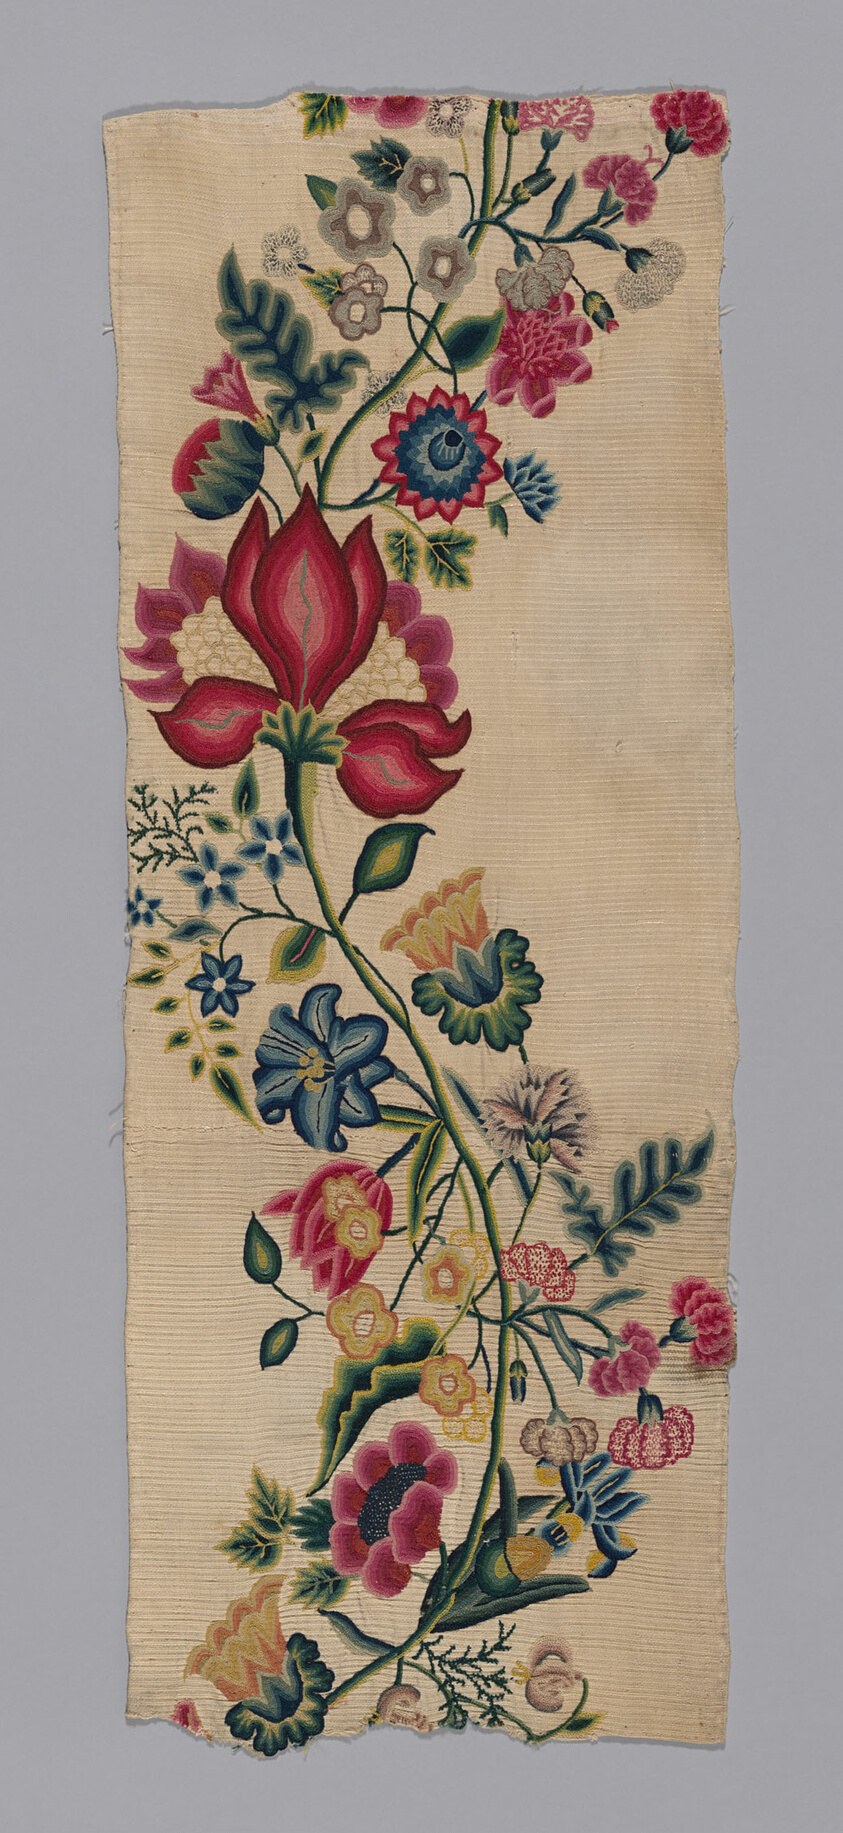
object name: Textile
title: Border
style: queen anne, stuart, european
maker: England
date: Queen Anne period (1702–1714), early 18th century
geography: England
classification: textile; needlework (visual works)